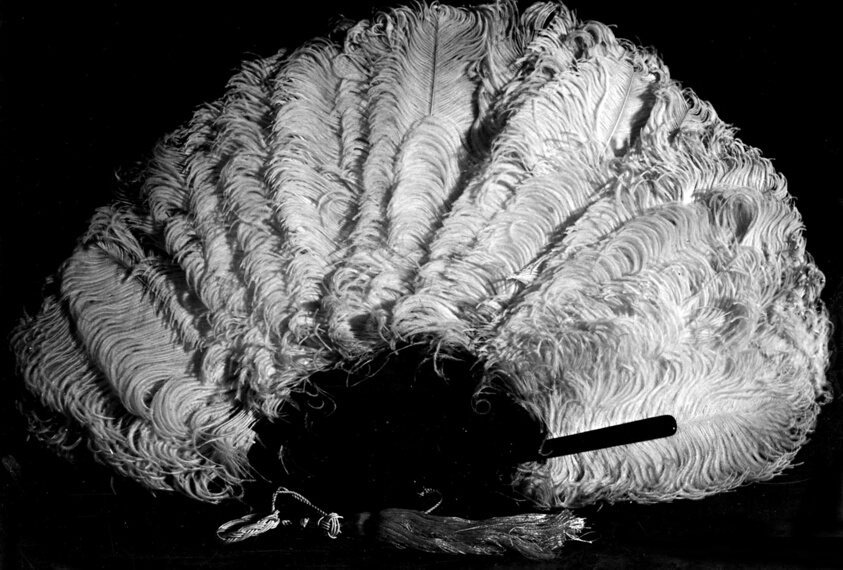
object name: Costume and Accessories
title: Fan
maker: United States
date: 19th century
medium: White ostrich feathers on plain tortoise shell sticks and guards; shell rivet and loop; white silk cord and tassel with finger loop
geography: United States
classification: textile; fan - weaving; costume accessory - folding fan; costume